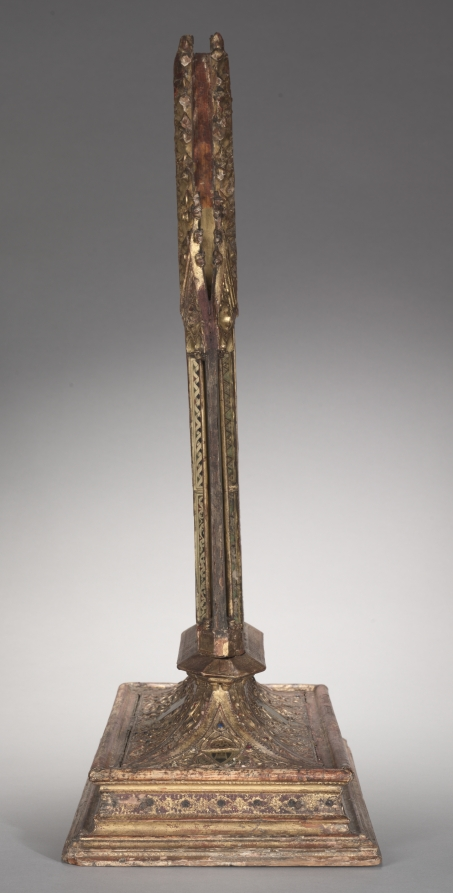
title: Frame for a Portable Reliquary Icon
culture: Italy, Siena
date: 1347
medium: gilded wood, modeled gesso, verre églomisé, glass cabochons, and relics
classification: Glass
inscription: an inscription with a stipled background runs around the lowest edge of the upright part of the frame: obverse: HOC/OPUS : FACTUM . FUIT . SUB . ANNO . DO/MINI; reverse: [small loss] /CCC . XLVII . TEMPORE . DOMINI . MINI/CINI. [This/work : has . been . made . under . year . of . the . Lord [small loss] /300 47 . in . the . time . of the Lord . Mini/Cini.] Another inscription appears on the obverse and reverse of the base: LUCAS ME FECIT. [Luke has made me.]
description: In the Middle Ages relics were thought to possess extraordinary power and were enshrined in lavish vessels called reliquaries. This complex frame once contained a painted image on each side, believed to be the Madonna and the Crucifixion, both long since lost. These images were surrounded by 17 carefully labeled relics, still visible. Intentionally portable, such votive objects could be easily carried from room to room or building to building as needed. A Latin inscription around the base reads: This work has been made under the year of the Lord CCCXLVII [1347] in the time of the Lord Mini/Cini. The inscription likely refers to Mino Cinughi, rector of the Hospital of Santa Maria della Scala in Siena, 1340-51. The Cinughi coat of arms as well as those of the hospital appear on the base. Another inscription, LUCAS ME FECIT (Luke made me), appears on both sides of the base. While this object probably resided on an altar in the hospital, the fact that it has two sides suggests it was carried aloft in processions.